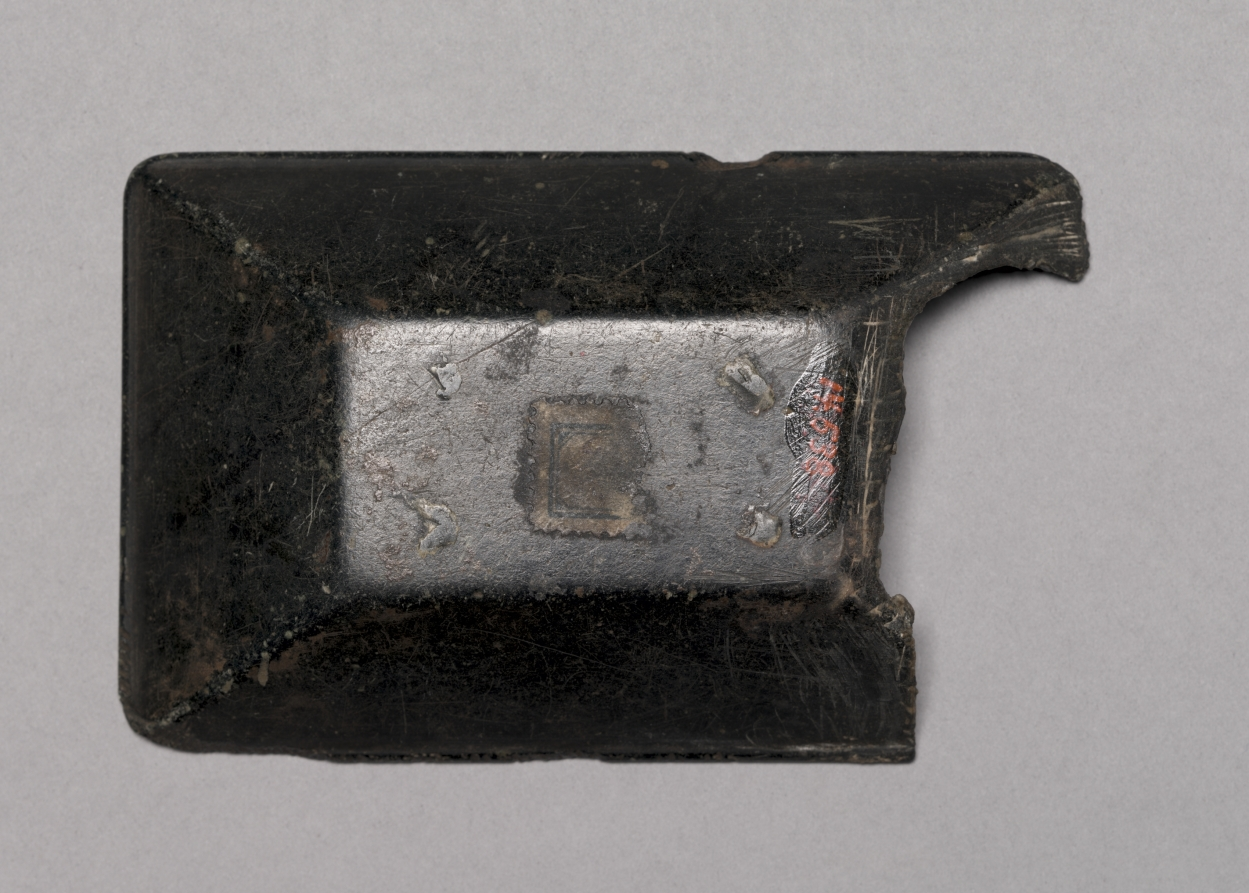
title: Tray with Pond Scene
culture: Egypt, New Kingdom (1540–1069 BCE), Dynasty 18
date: 1540–1296 BCE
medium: steatite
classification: Cosmetic Objects